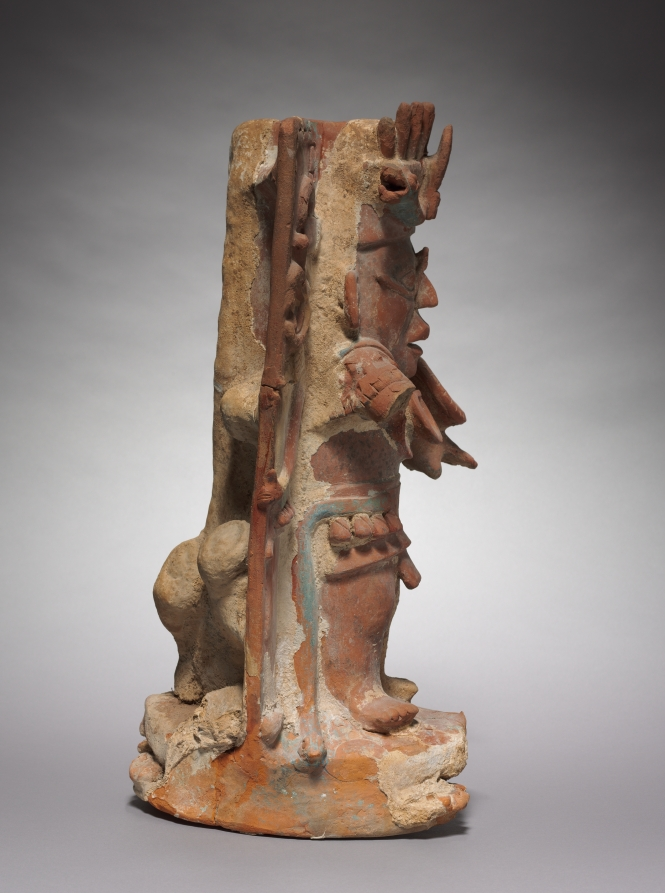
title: Incense Burner Support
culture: Mexico, Chiapas, Palenque Region, Maya, Classic period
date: 600–900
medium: pottery with polychrome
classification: Sculpture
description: This stand, made of a large tube with side panels, originally held a bowl used to ritually burn incense. Modeled on the front is a group that includes the Maya sun deity and two flanking, profile figures in lower relief. All are supported by a turtle, a symbol of the earth and the underworld. Thus, the ensemble may be a model of the cosmos.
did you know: Calcium deposits indicate this incense burner was found in a cave, which the Maya viewed as entrances to the underworld.